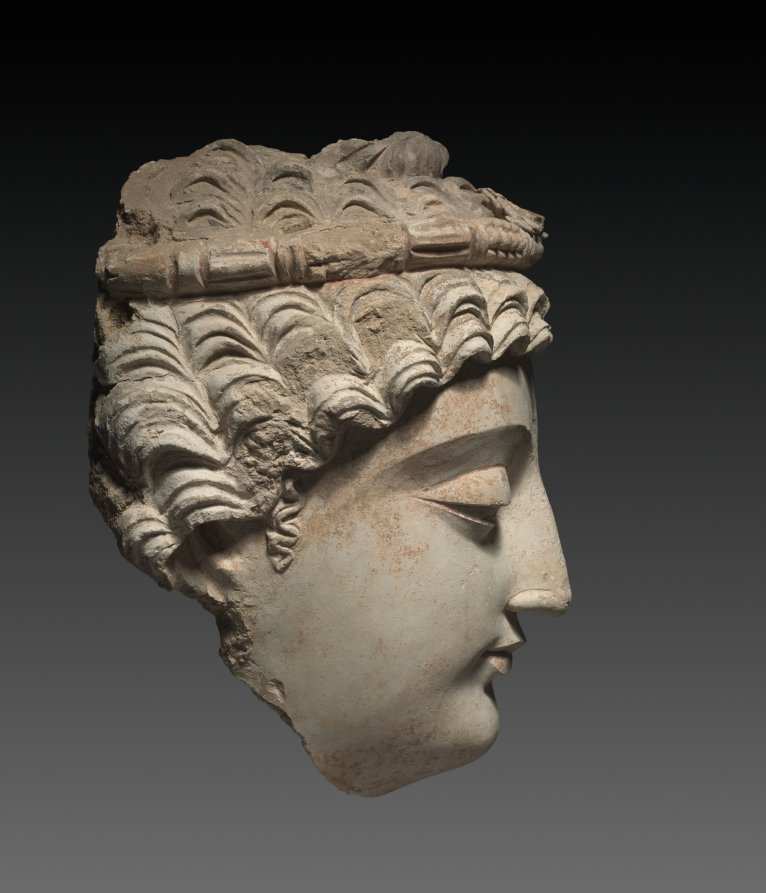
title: Head of Bodhisattva Avalokiteshvara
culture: Afghanistan or Pakistan, Gandhara, Kushan period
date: 300s–400s CE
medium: stucco with traces of paint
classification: Sculpture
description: By this period, individual bodhisattvas were beginning to be revered as ideal figures who would deliberately postpone their own enlightenment and entrance into final nirvana, which is a state from which no one returns to be reborn into this world. Bodhisattvas accomplish all but the final meditation leading to full enlightenment, but they are considered to be so advanced in their practice and realization that they have the ability to control their rebirth and act in righteous and compassionate ways to help others achieve enlightenment. Because the remains of a lotus pedestal on which a Buddha sat is at the center of the diadem, this head can be identified as that of the Bodhisattva of Compassion. The idealized linearity of the brows and eyes along with the formalized waves of hair give an ethereal quality to the otherwise naturalistic face.